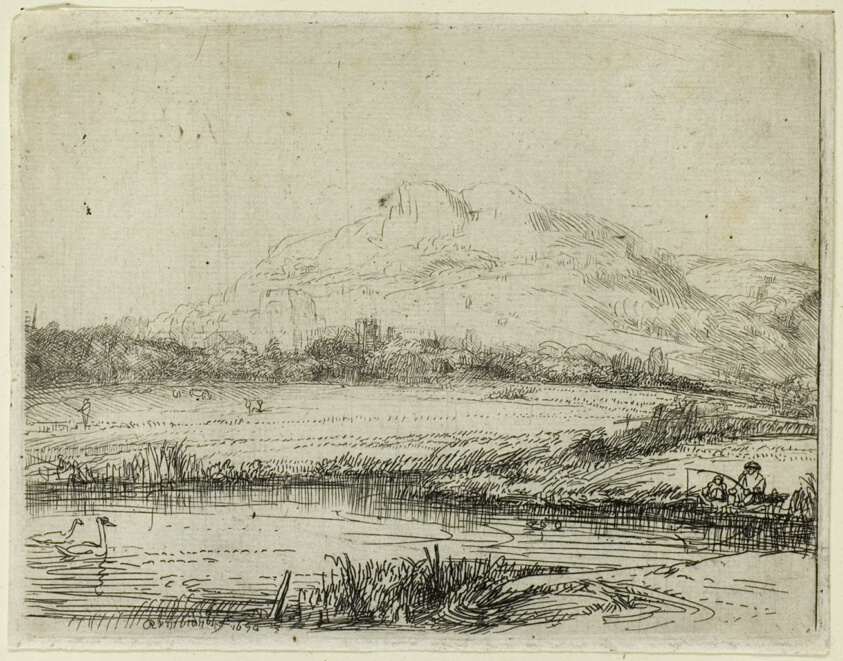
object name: Print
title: Canal with an Angler and Two Swans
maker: Rembrandt van Rijn (Dutch, 1606-1669)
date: 1650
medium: Etching and drypoint on off-white paper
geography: Holland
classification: etching; print; prints and drawing; paper; drypoint